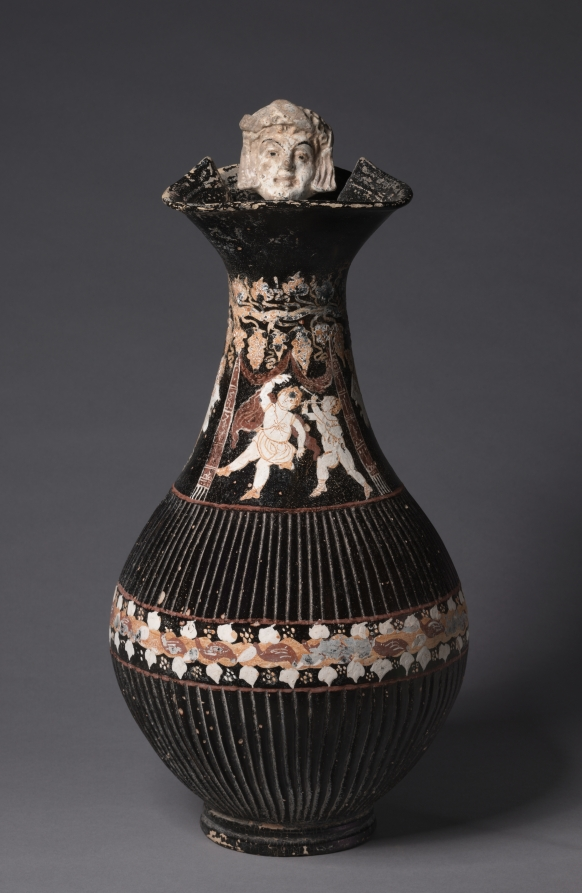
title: Gnathian Ribbed Oinochoe (Wine Jug): Masks, Dancer, and Flute-Player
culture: South Italian, Apulian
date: c. 300–275 BCE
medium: ceramic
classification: Ceramic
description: The ornate decoration of this grand vessel takes several forms. A mold-made male theater mask sits at the upper handle attachment, looking out over the rim. Below this, two chubby boys—a dancer and pipe-player—cavort on the neck, flanked by female masks. Farther down, a band of ivy leaves and berries on a red and yellow ribbon adorns the widest point of the vessel, with ribbing above and below.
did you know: The ribbed lower body of this large jug likely emulates vessels made of precious metal.